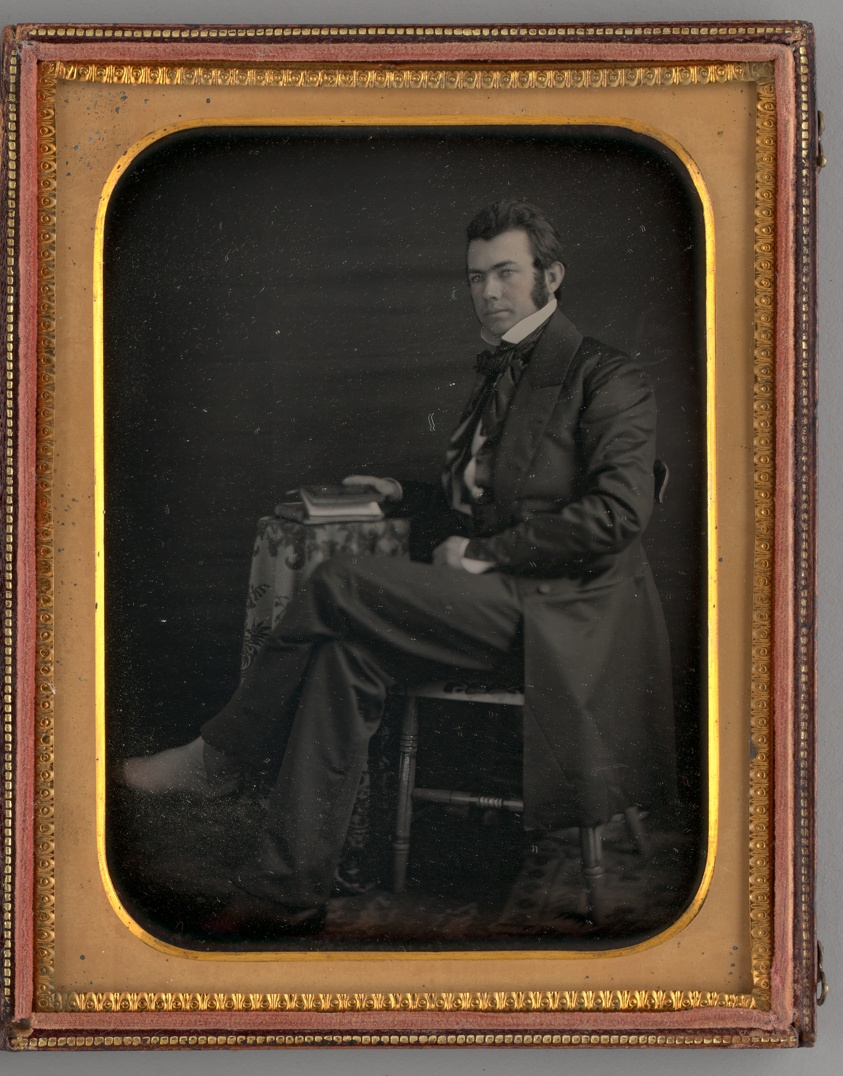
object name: Photograph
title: Untitled (Portrait of a Seated Man)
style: 19th century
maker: Allen's Gallery (Amos Morrel Allen); American, 1823-1900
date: 1855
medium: Daguerreotype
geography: United States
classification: portrait; photograph; photographic process; photography; portrait; daguerreotype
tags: lundberg collection, portrait, Male, reading, portraits, portraits: male subject